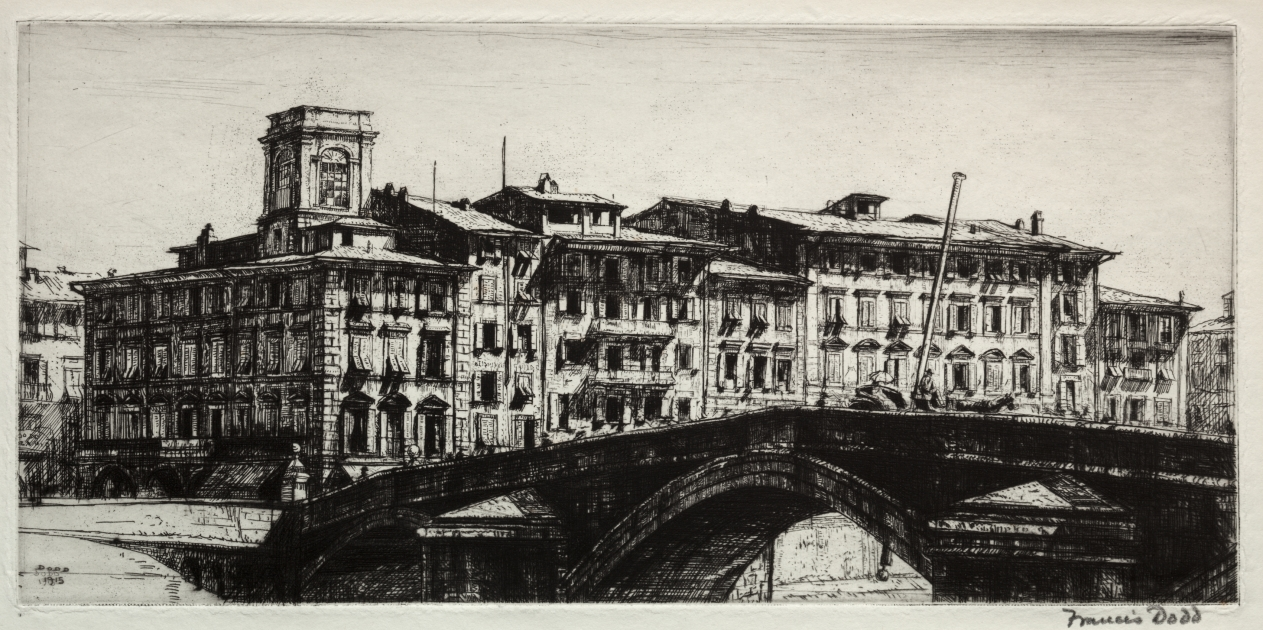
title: Ponte di Mezzo, Pisa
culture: England, 20th century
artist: Francis Dodd (British, 1874–1949)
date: 1915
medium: drypoint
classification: Print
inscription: Lower margin, in graphite: Francis Dodd